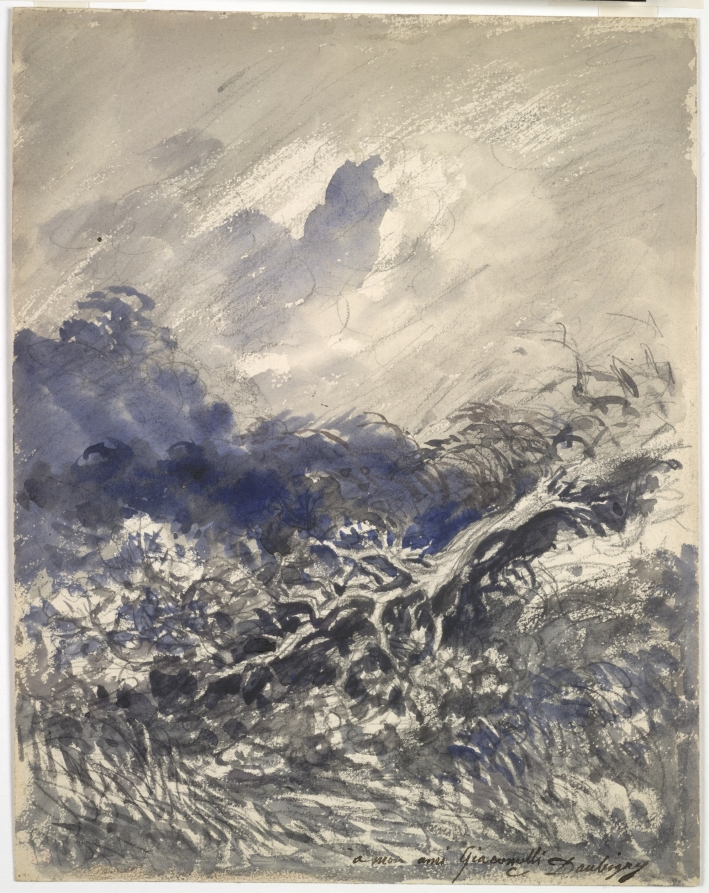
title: The Oak Tree and the Reed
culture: France, 19th century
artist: Charles François Daubigny (French, 1817–1878)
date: c. 1873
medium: blue, gray, and black wash, and graphite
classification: Drawing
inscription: signed, lower right, in brown ink: à mon ami Giacomelli / C Daubigny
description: The Oak Tree and the Reed illustrates the fable of the same name by the 17th-century French writer Jean de La Fontaine (1621-1695). Having disdainfully pitied the reed for bending before the wind, the oak is shown torn from the earth by a terrific north wind. Focusing upon the uprooted oak, Daubigny created a violently expressive treatment of the subject. The bold dappling of lights and darks below is set off by the intense blue of the clouds encroaching upon the land from the left. The diagonal streaks of thin-ly applied gray wash above suggest driving rain.